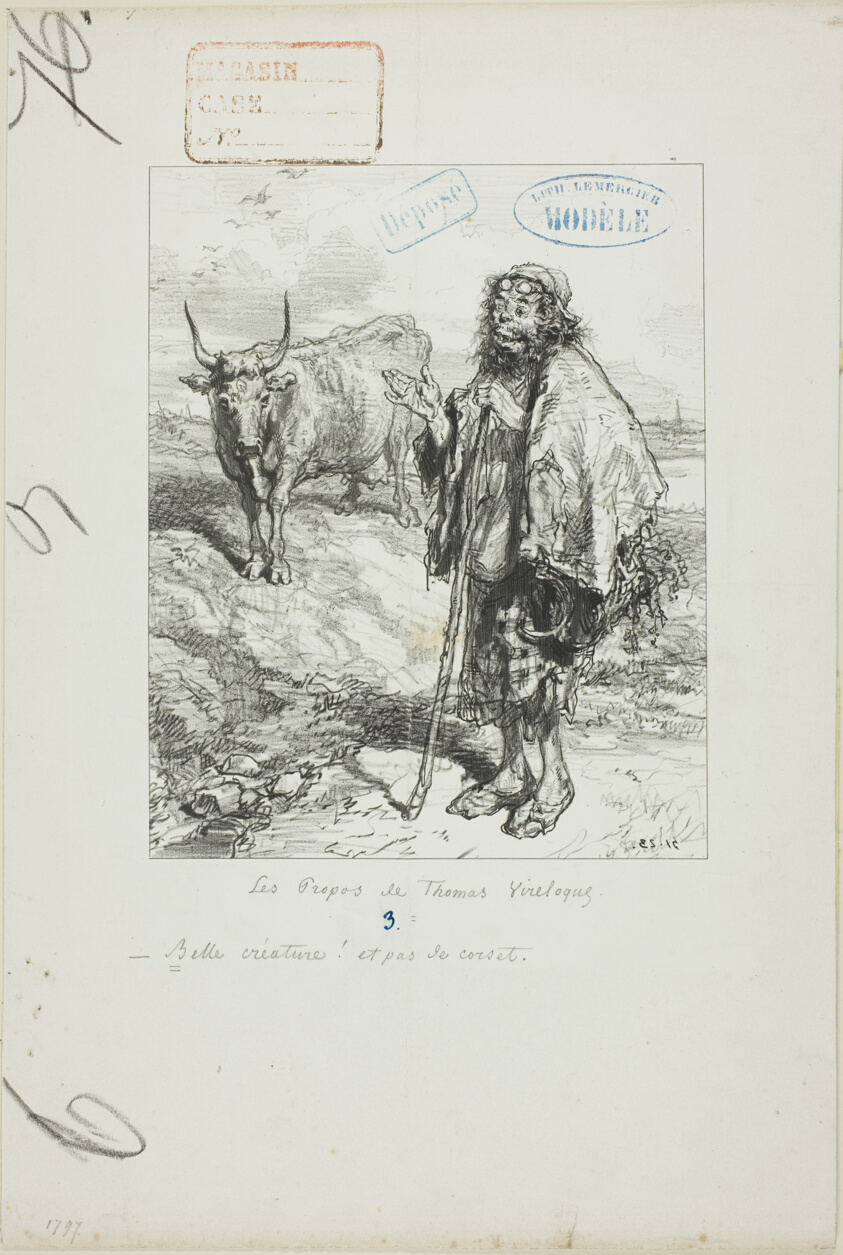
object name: Print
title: Les-Parents-Terribles series: A fine creature—and no corsets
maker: Paul Gavarni (French, 1804-1866)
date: 1852–53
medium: Lithograph in black on cream wove paper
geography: France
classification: lithograph; print; prints and drawing